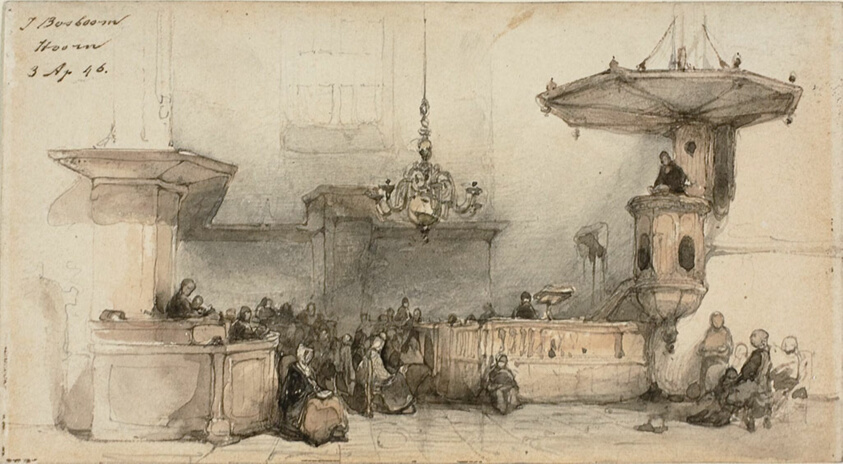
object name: Drawing and Watercolor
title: Interior of a Church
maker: Johannes Bosboom (Dutch, 1817-1891)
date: 1846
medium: Pen and brown ink, with watercolor and graphite, on cream wove card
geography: Holland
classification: ink or chalk wash; drawings (visual works); prints and drawing